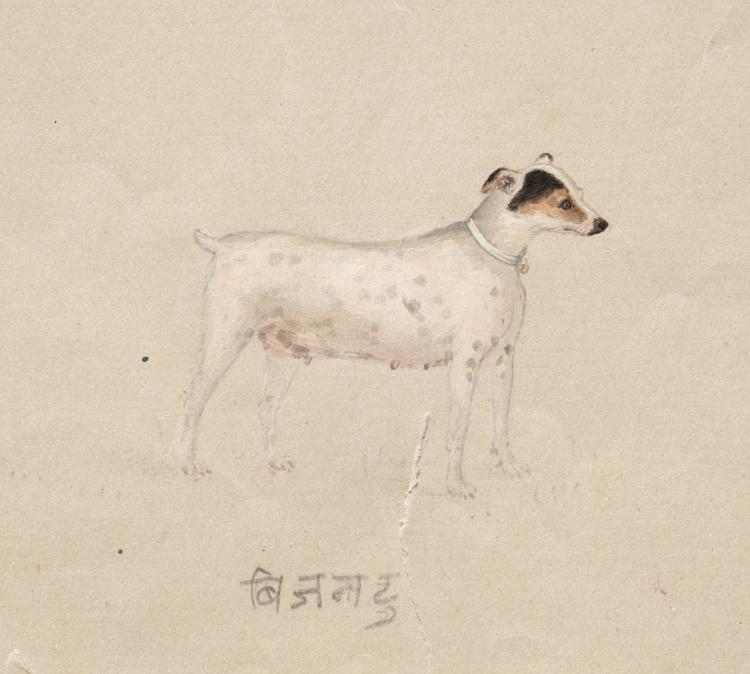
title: Bijantu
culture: British India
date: 1890s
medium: Gum tempera and graphite on paper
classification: Drawing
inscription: Bijantu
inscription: BOMBAY 1891